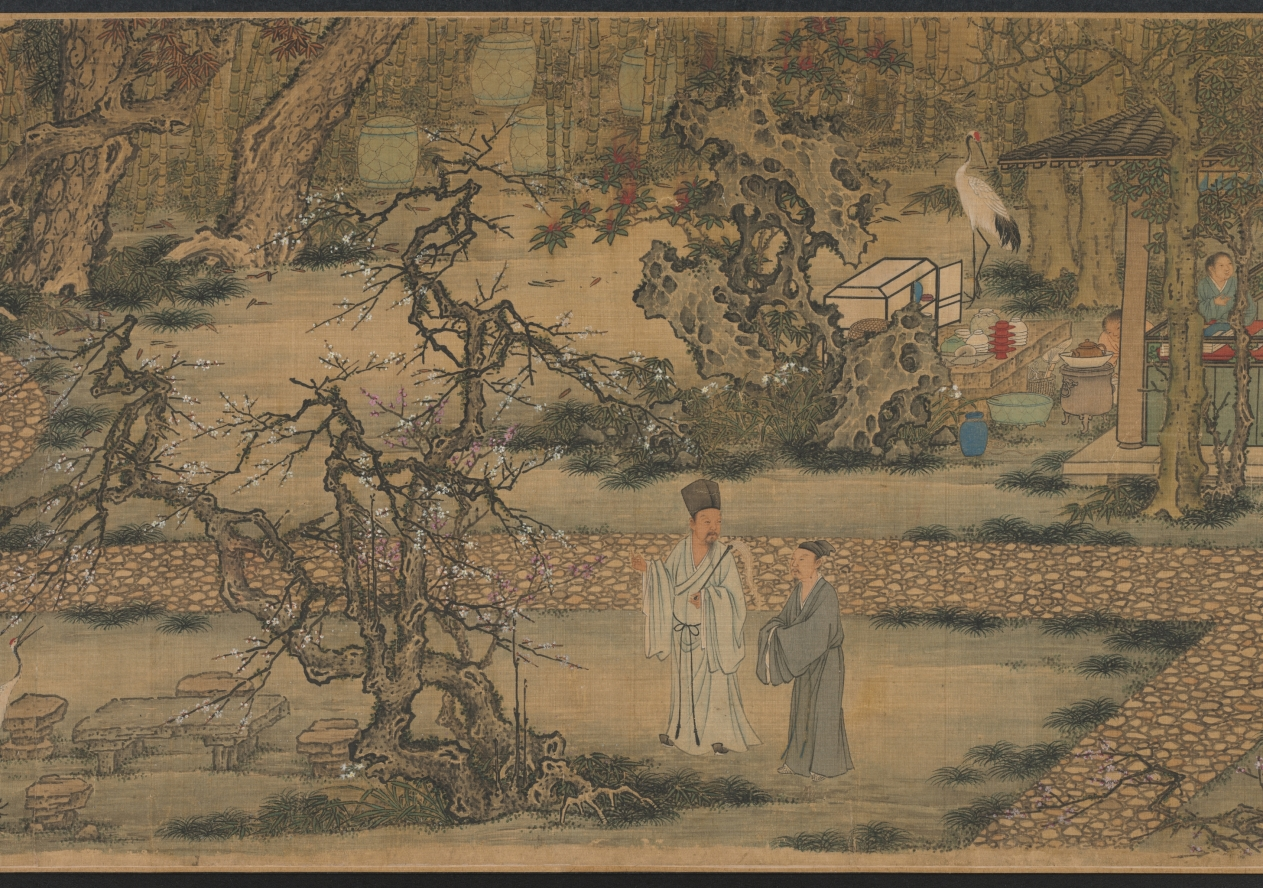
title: The Nine Elders of the Mountain of Fragrance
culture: China, Ming dynasty (1368–1644)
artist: attributed to Xie Huan (Chinese, c. 1370-c.1450)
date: 1426–52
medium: handscroll, ink and color on silk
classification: Painting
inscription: 4 seals: 2 of Xiang Yuanbian 項元汴 (1525–1590); 1 of the Qianlong Emperor (r. 1736-95); 1 of C. C. Wang 王季遷 (1907–2003)